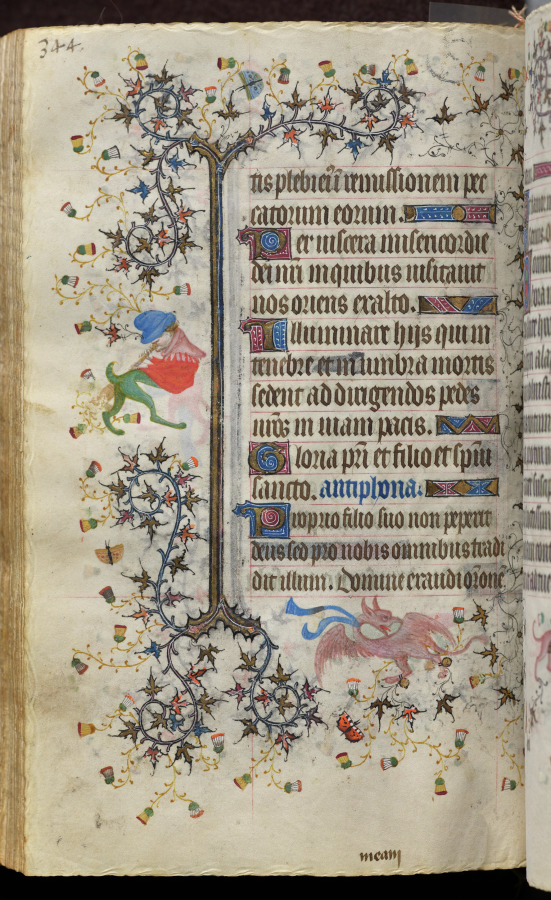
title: Hours of Charles the Noble, King of Navarre (1361-1425): fol. 167v, Text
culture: France, Paris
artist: Master of the Brussels Initials and Associates (French)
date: c. 1405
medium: ink, tempera, and gold on vellum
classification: Bound Volume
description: This precious volume was obviously highly prized by its owner, the French-born King of Navarre, who had his coat of arms painted on no less than twenty folios. Rather than directly commissioning this manuscript from a specific workshop, it seems that Charles the Noble acquired his book of hours -- perhaps ready-made for the luxury market -- while on a trip to Paris in 1404-05. A collaborative effort, six painting styles are evidenced within the pages of this codex, those of two Italians, two Frenchmen, and two Netherlanders. The painter who was responsible for the planning and decoration of the book, and who produced seventeen of the large miniatures, was a Bolognese artist known as the Master of the Brussels Initials. His principal assistant, responsible for most of the borders, was a Florentine who signed his name "Zecho" da Firenze on folio 208 verso.